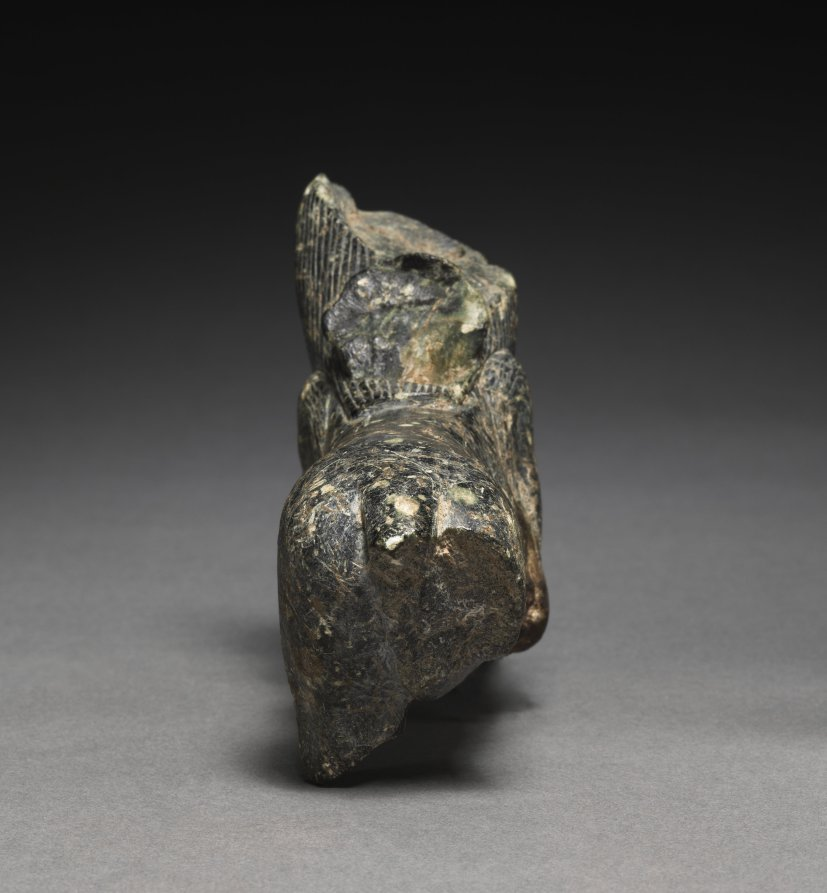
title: Tutu as Sphinx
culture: Egypt, Greco-Roman period (332 BCE–395 CE), Ptolemaic dynasty (305–30 BCE)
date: 150 BCE–30 CE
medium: gray steatite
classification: Sculpture